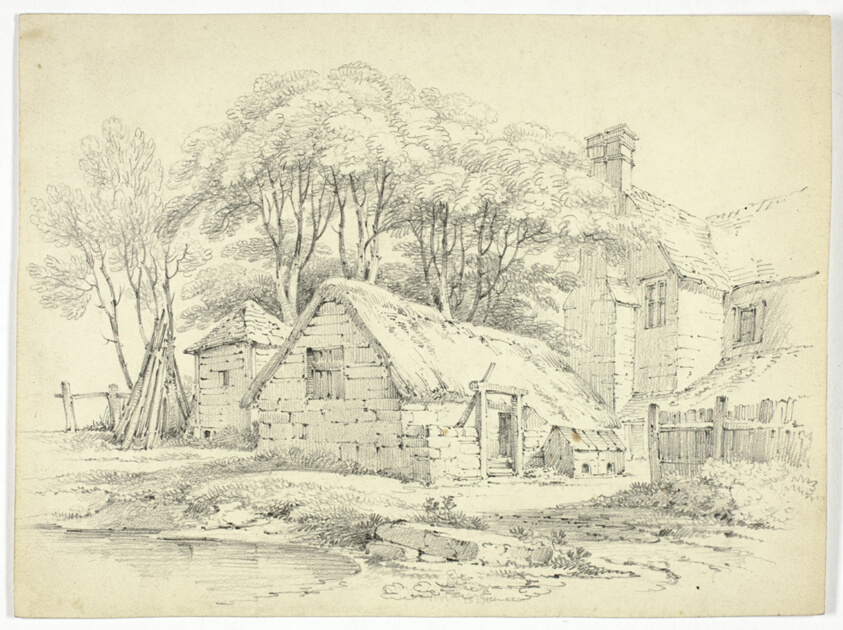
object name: Drawing and Watercolor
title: Farm Buildings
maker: Paul Sandby Munn (English, 1773-1845)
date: 1822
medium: Graphite, with spray fixative, on cream wove paper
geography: England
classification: graphite; drawings (visual works); prints and drawing